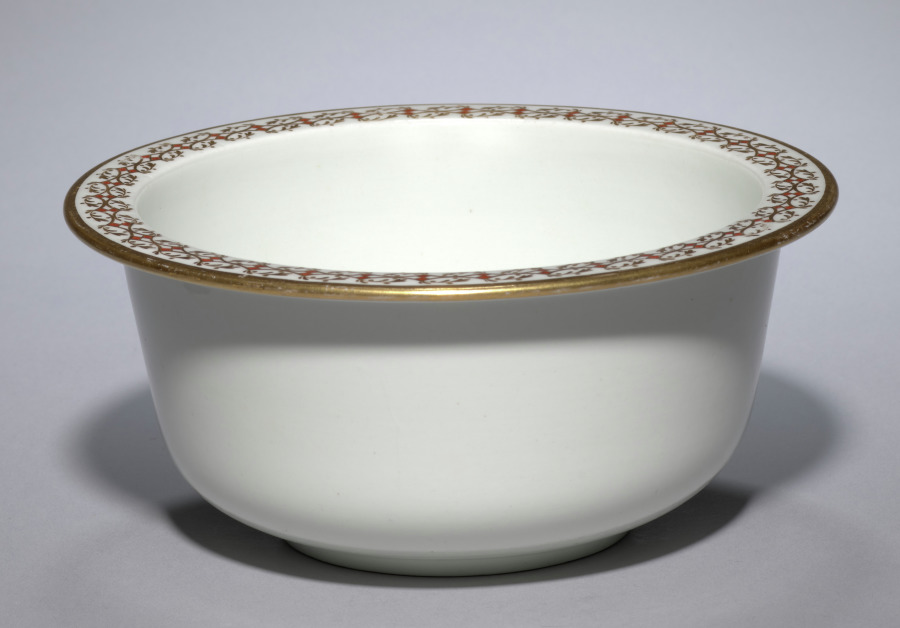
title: Liner for an Ice Pail (1 of 2)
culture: England, late 18th-early 19th Century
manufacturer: Flight & Barr (British)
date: c. 1792–1804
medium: porcelain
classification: Ceramic